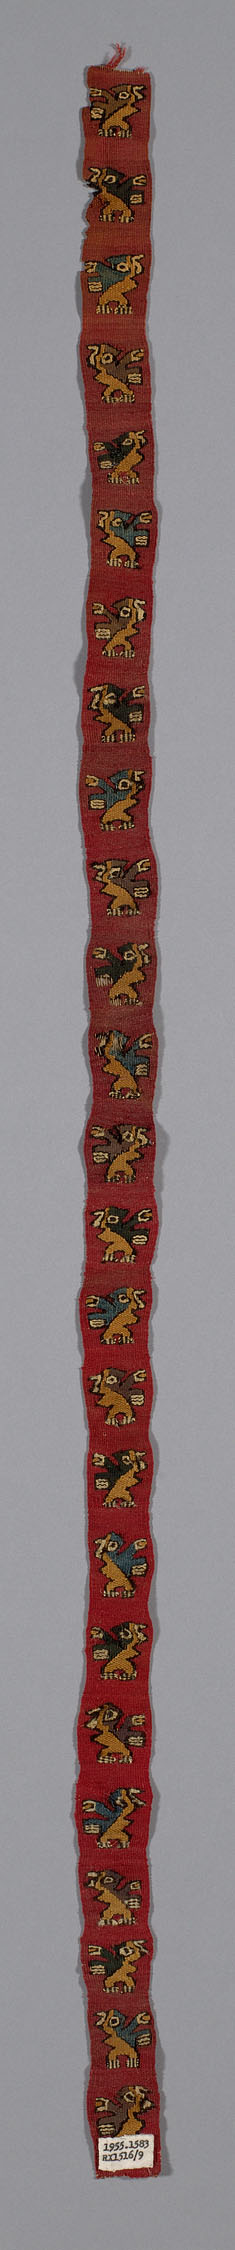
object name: Textile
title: Fragment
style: chancay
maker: Probably Chancay; Probably central coast, Peru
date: A.D. 1000/1476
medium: Slit tapestry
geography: Peru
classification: textile; weaving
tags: birds, animals